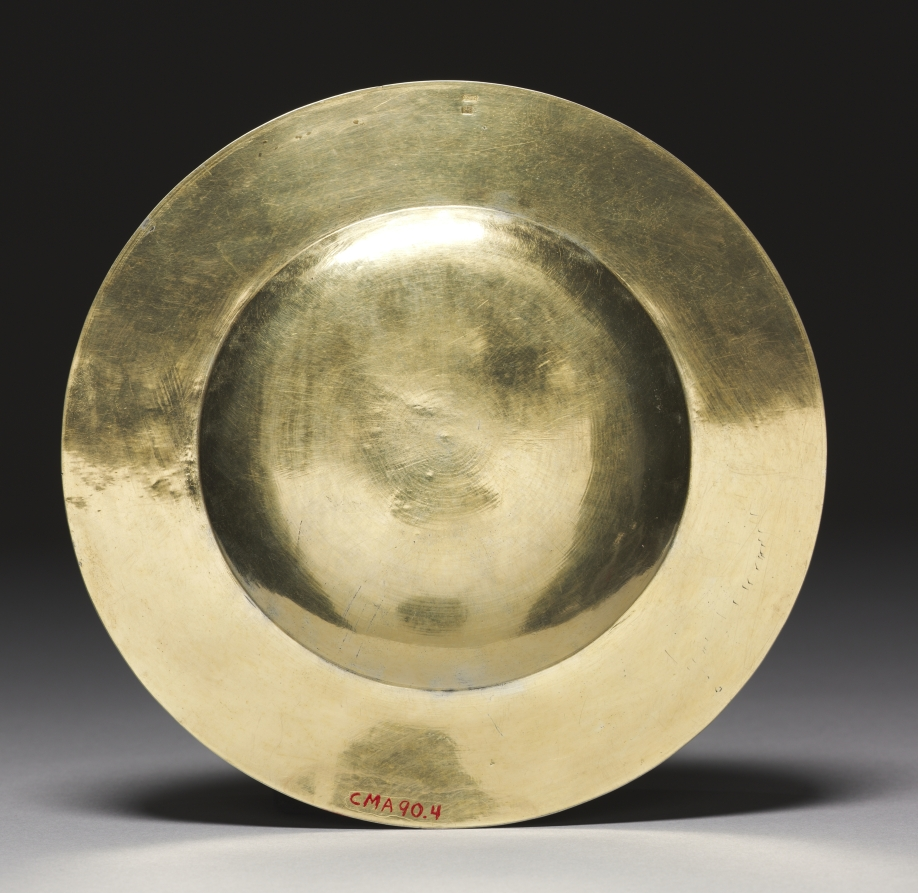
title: Paten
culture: Hungary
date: c. 1450–80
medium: gilt silver and filigree enamel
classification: Metalwork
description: The chalice and paten—the most important liturgical vessels—are used at the altar by the priest for the consecration of the Eucharistic bread and wine during the celebration of the mass. This chalice survives with its original paten. The form of the chalice evolved over the centuries. Gothic chalices, like this one, gradually developed angular or faceted knops, generally hexagonal, with lobed feet. This sublime example is decorated with filigree enamel consisting of twisted gold wire forming a floral design, which in turn is filled with colorful glass pastes. Gemstones add to the embellishment.